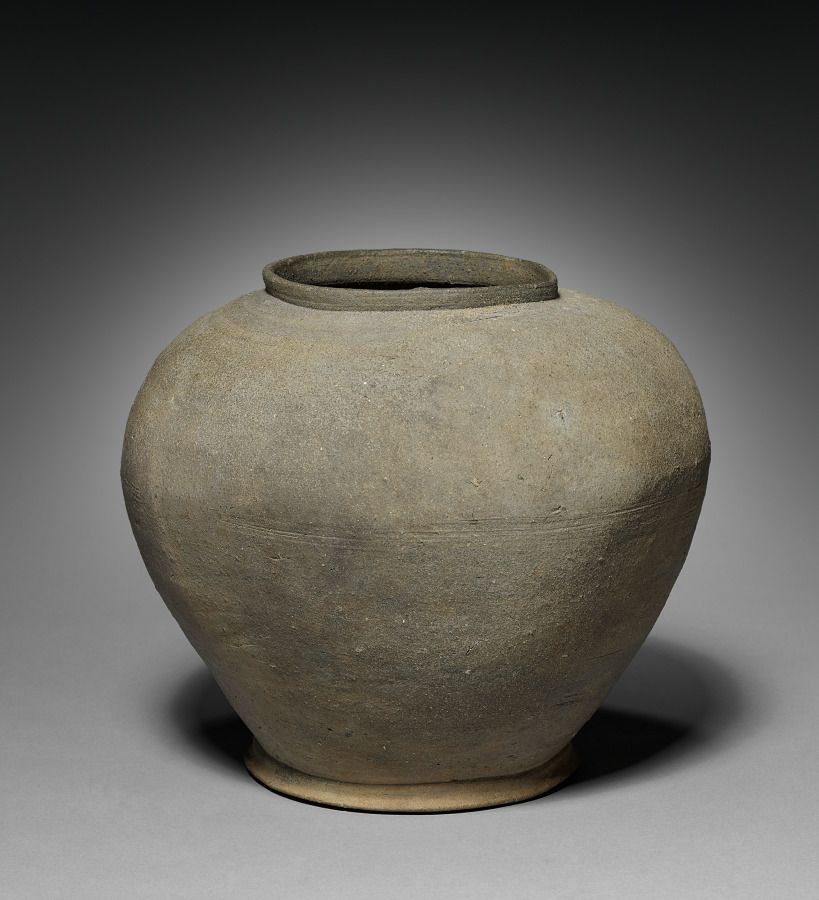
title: Cinerary Urn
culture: Japan, Heian period (794–1185)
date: c. 800–850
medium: stoneware with slight natural ash glaze (Sue ware)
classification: Ceramic